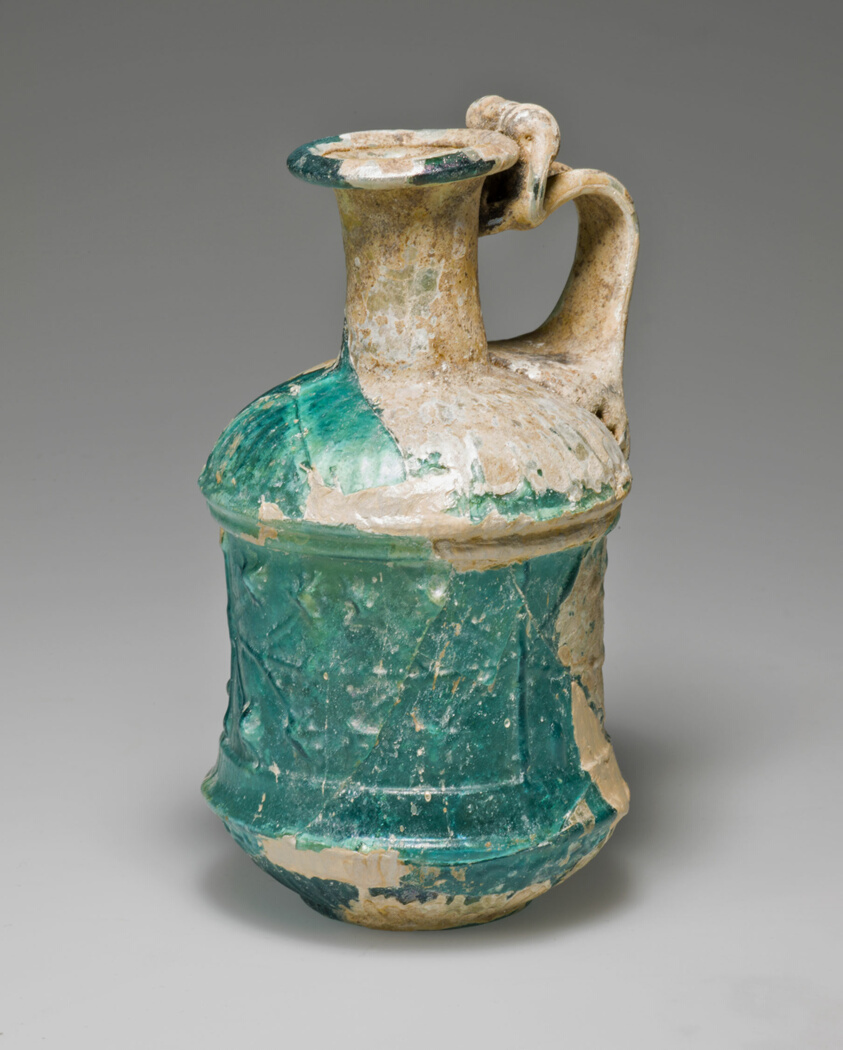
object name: Vessel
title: Jug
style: roman (ancient, style or period), ancient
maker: Roman; Syria or Palestine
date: first half of the 1st century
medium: Glass, mold-blown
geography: Syria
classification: pitcher (vessel); glass; vessel; ancient art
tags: containers